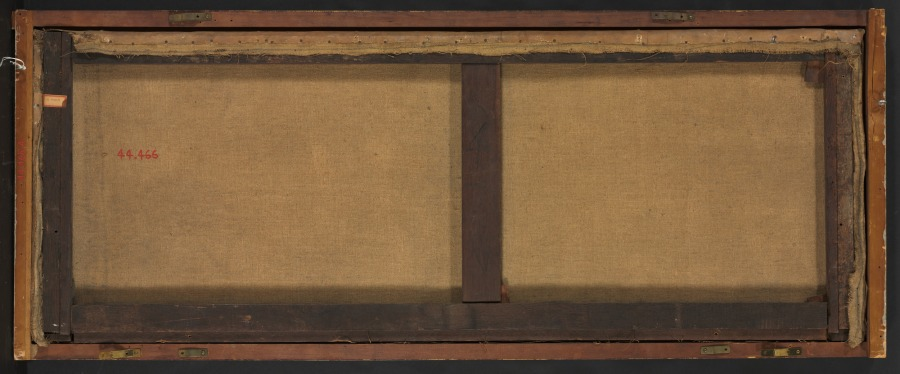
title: Overdoor Painting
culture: France, 18th century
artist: Pierre Rousseau (French, 1751–1829)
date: 1790s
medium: oil on canvas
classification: Painting